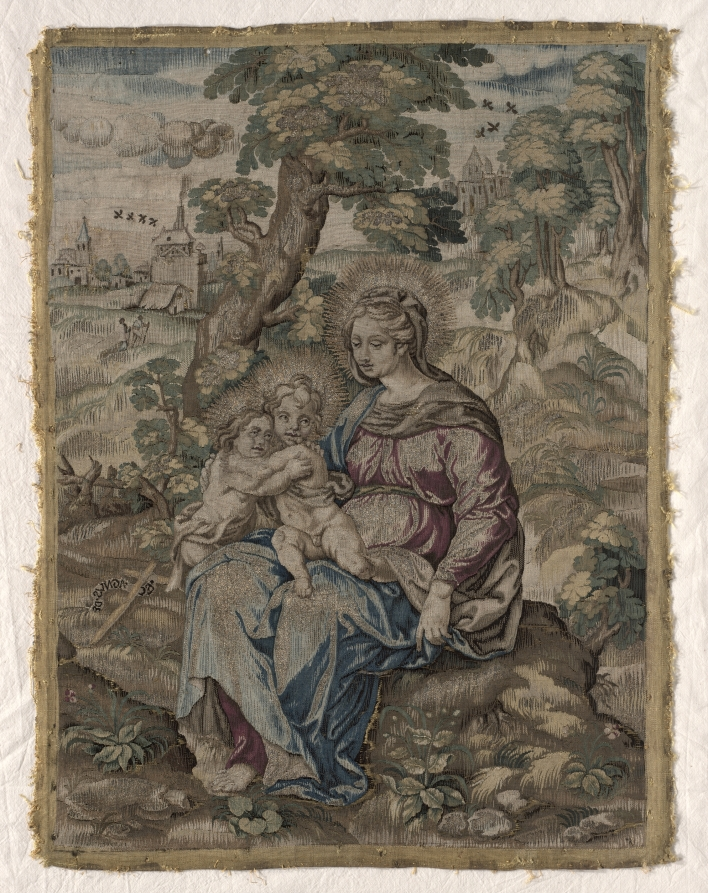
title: Madonna with Christ Child and Saint John the Baptist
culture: Belgium, 16th century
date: 1500s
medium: tapestry weave, silk and gold thread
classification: Textile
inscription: on ground to the left is a scroll which reads in mirror reverse: "Ec[ce] Agnus De[i]."